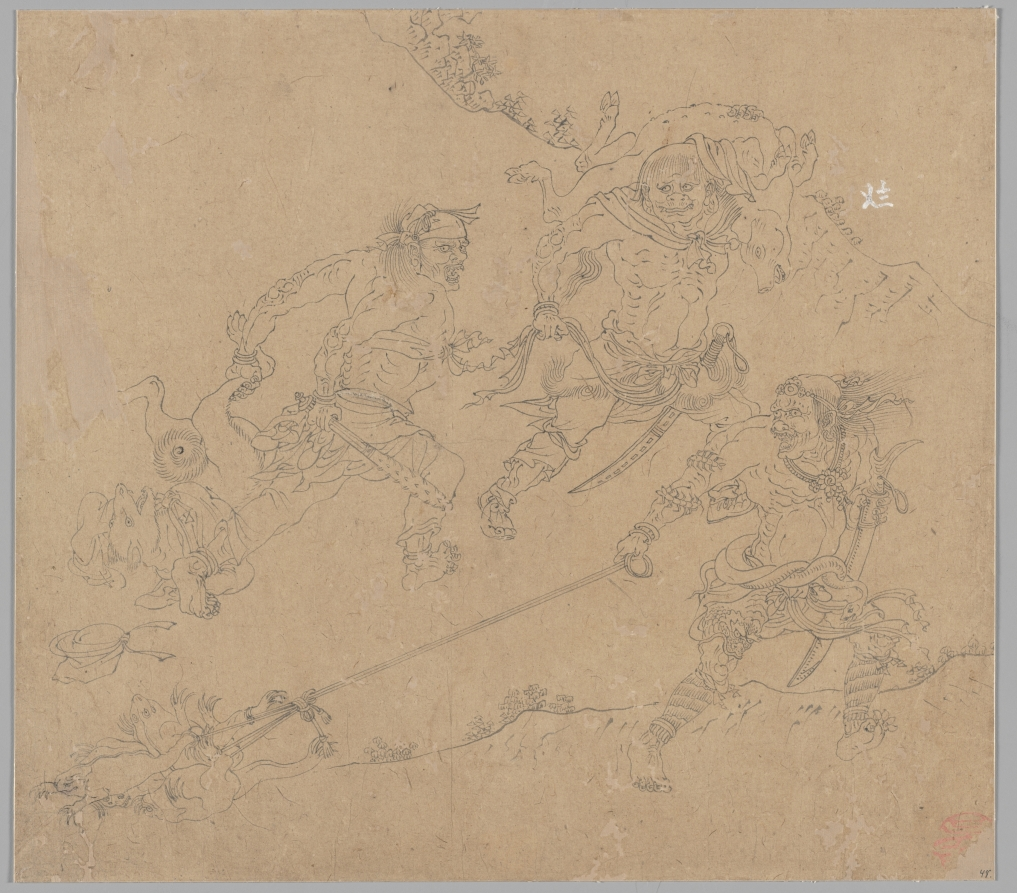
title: Album of Daoist and Buddhist Themes: Search the Mountain: Leaf 48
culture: China, Southern Song dynasty (1127-1279)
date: 1200s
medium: Album, ink on paper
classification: Painting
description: This extraordinary album has 50 paintings on a variety of religious subjects. They were likely created by several master craftsmen to share with studio apprentices as models for fulfilling commissions. The Jade Emperor and the Daoist pantheon make up the first 26 leaves. The next 14 leaves portray the Buddhist Ten Kings of Hell administering punishments to the dead. The third section, called “Clearing the Mountains,” features divine soldiers, led presumably by the deity Erlang Shen 二郎神, fighting undesirable creatures.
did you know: Below, a soldier drags two frogs behind him with a rope. Above, a demon drags a fox by its leg; another carries a cow over his shoulders.